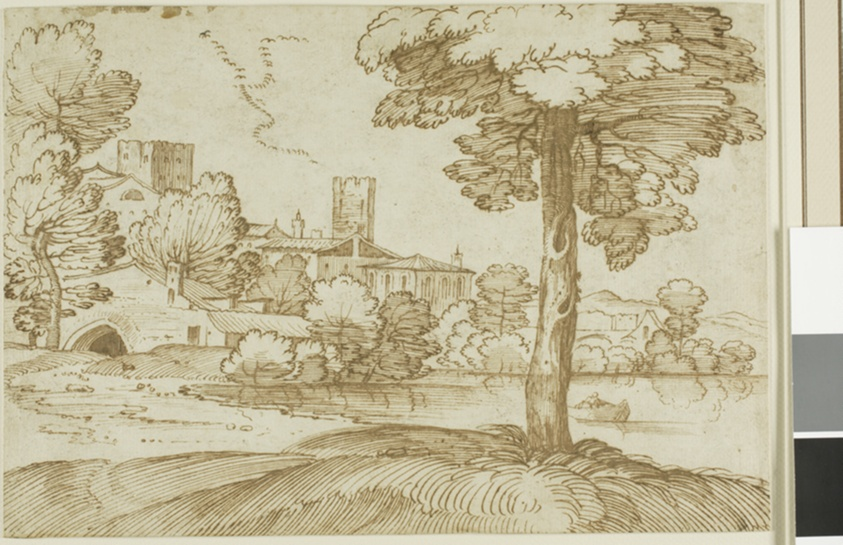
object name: Drawing and Watercolor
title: Landscape with a Large Tree on the Right and a Distant View of a Town on the Left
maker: Giovanni Francesco Grimaldi, called Il Bolognese; Italian, 1606-1680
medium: Pen and brown iron gall ink, over charcoal, on ivory laid paper, laid down on cream card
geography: Italy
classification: drawings (visual works); prints and drawing